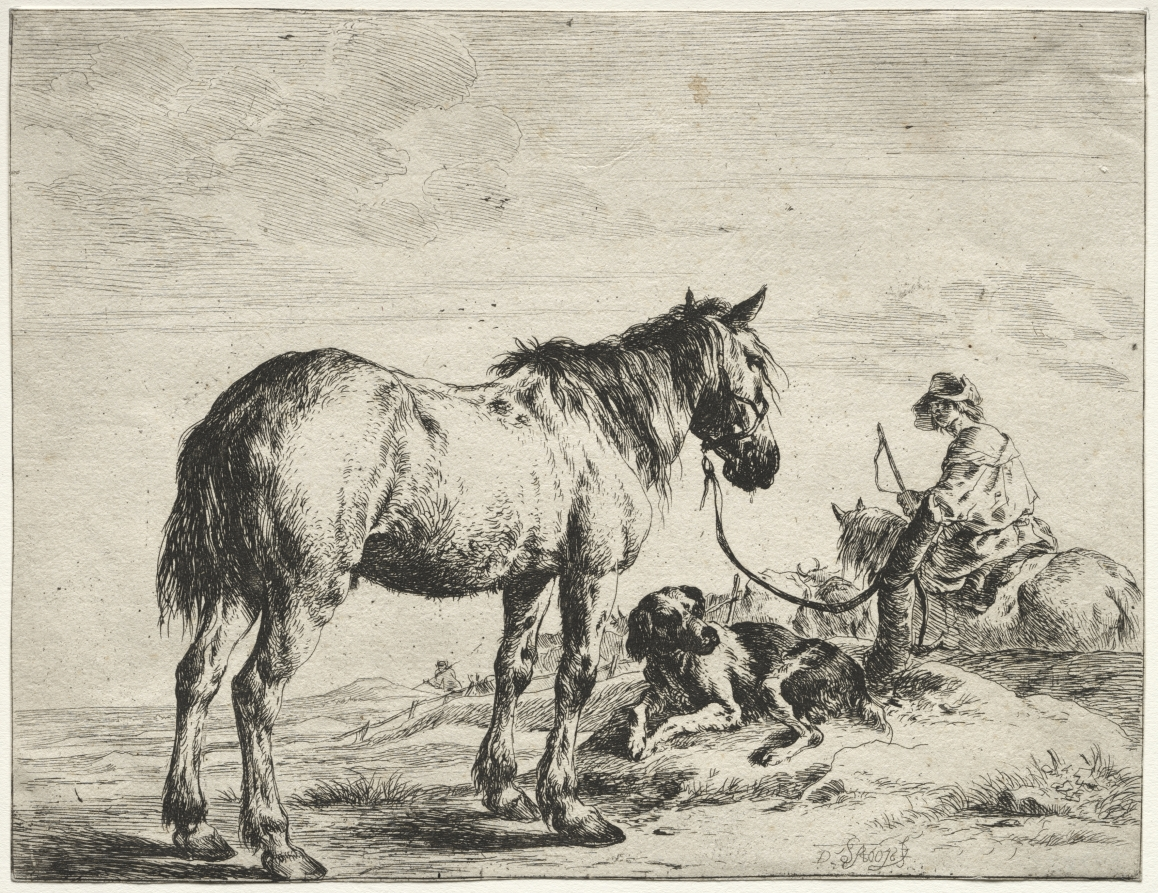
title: Horse bound to a post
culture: Netherlands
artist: Dirck Stoop (Dutch, c. 1618–1681)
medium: etching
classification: Print